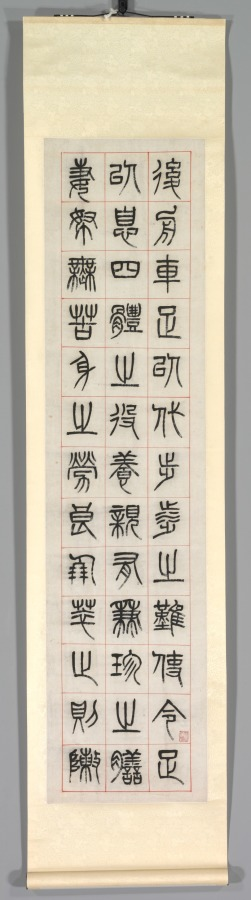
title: On Happiness, Calligraphy in Seal Script Style (zhuanshu)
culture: China, Changsu, Qing dynasty (1644-1911)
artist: Yang Yisun (Chinese, 1813–1881)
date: 1871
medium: hanging scroll, ink on paper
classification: Painting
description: Yang Yisun transcribed this ancient text on six narrow scrolls, starting at the top right and ending at the bottom left. Yang emphasizes the text’s historic nature by using the seal script style found on stone steles and bronze vessels. On Happiness features reflections of a scholar on a leisurely life in the countryside, composed by Han dynasty official Zhongchang Tong, who died the year the Han dynasty collapsed (AD 220). The idyllic life described in the text may bean evocation of the past in a time of national crisis. A decade before Yang wrote these scrolls, Anglo-French forces had looted and burned the Summer Palace in Beijing. At the same time, the domestic Taiping rebellion (1850–64), led by a religious fanatic to overthrow the Qing government, had devastated Yang’s homeland, the Jiangnan region, with an estimated 20 million lives lost.